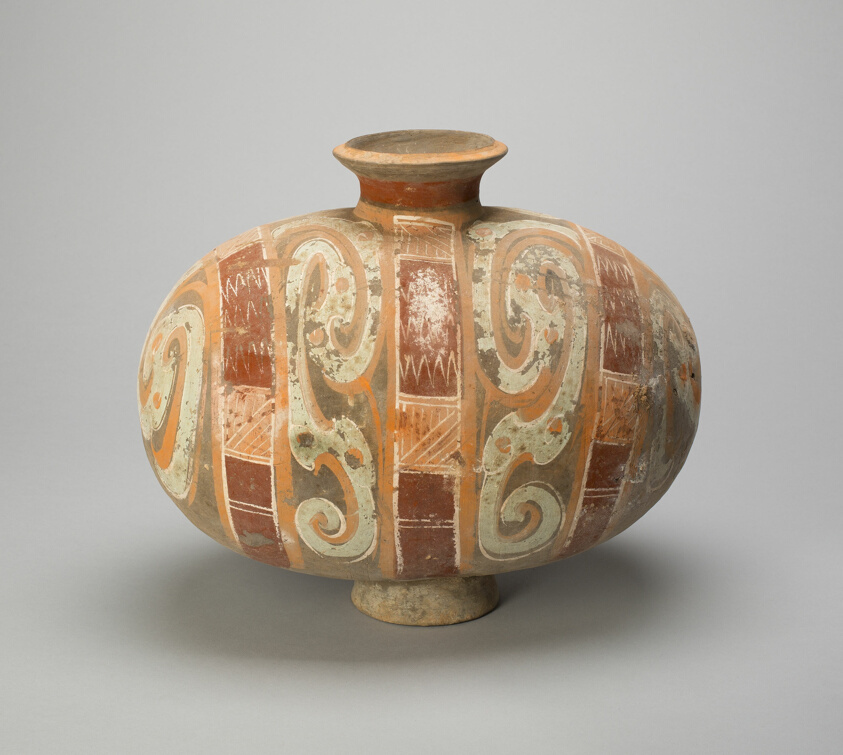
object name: Vessel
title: Cocoon-Shaped Flask (Jianxinghu)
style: Chinese (culture or style)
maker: China, probably Shaanxi or Hunan province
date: Qin or early Western Han dynasty, late 3rd or 2nd century BCE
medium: Buff earthenware with polychrome pigments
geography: China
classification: earthenware; ceramics; asian art; vessel